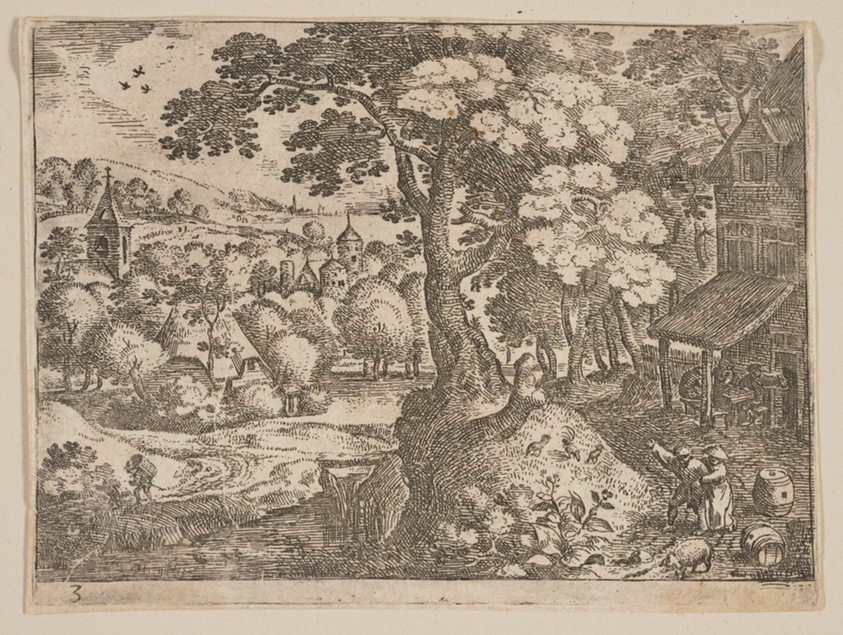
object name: Print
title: Tavern to Right of a Path, from Landscapes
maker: Jacob Savery; Flemish, 1566–1603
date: c. 1595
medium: Etching on ivory laid paper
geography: Flanders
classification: etching; paper; print; prints and drawing